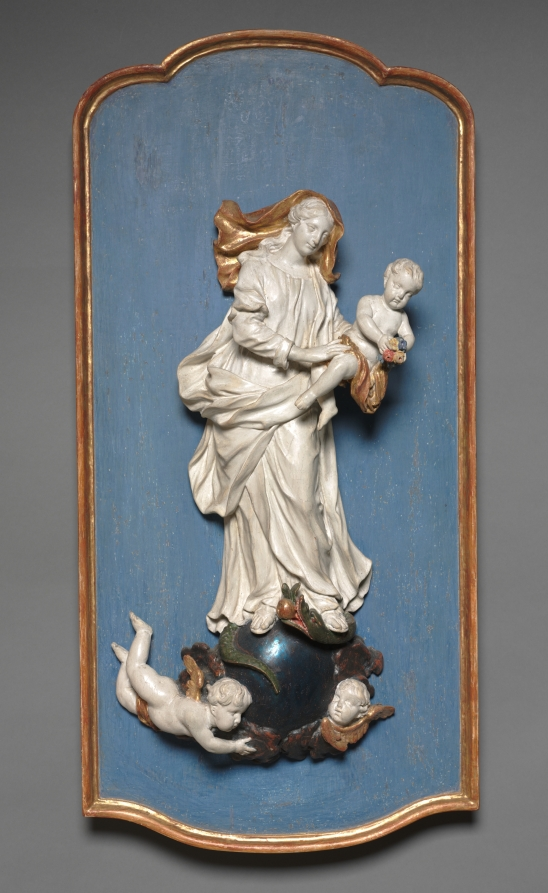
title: The Immaculate Conception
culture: Germany, Würzburg, 18th century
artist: assisted by Johann Peter Alexander Wagner (German, 1730–1809)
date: c. 1765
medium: painted wood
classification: Sculpture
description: This work has been associated with Johann Pieter Wagner, one of the leading Austrian sculptors of the second half of the 18th century. Because of its small size, it was most likely either a model for a larger altarpiece or an object designed for private devotion. Gold serves as celestial decoration around the border and on the figures. The Virgin Mary stands upon billowing clouds held up by angels, a variant on the Madonna of Victory, which features Mary or Jesus holding a spear. Mary holds the infant Jesus, while trampling a serpent-symbolizing the triumph of good over evil. The holy child holds a bouquet of flowers, representing his ability to bestow grace, expressing the benevolence associated with the cult of the Immaculate Conception.